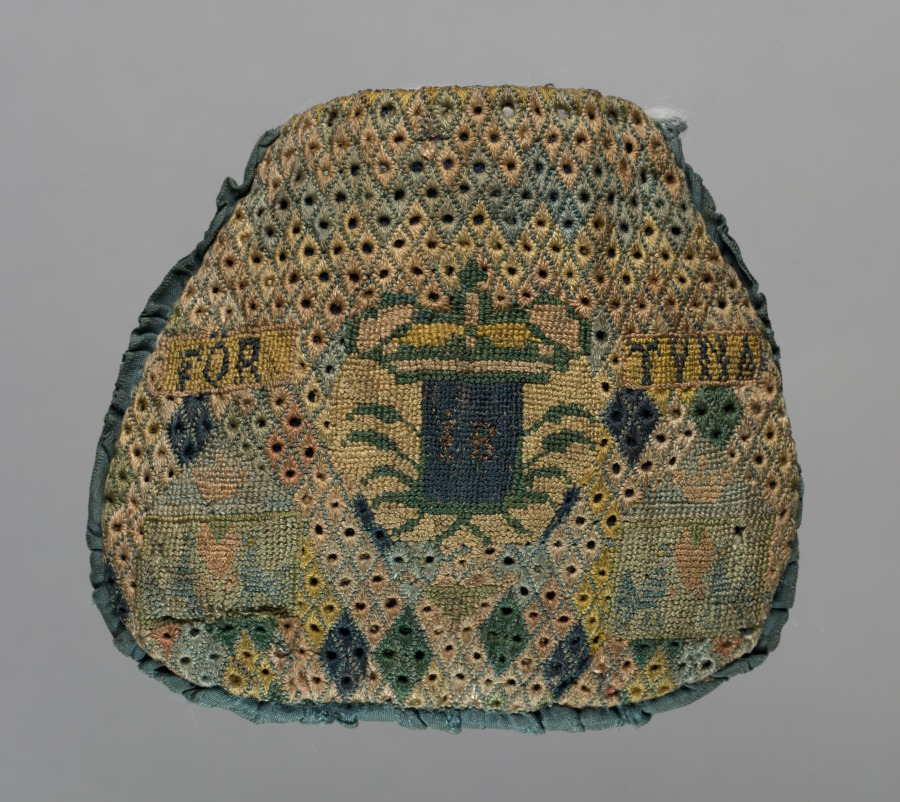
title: Purse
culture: Sweden, 18th century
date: 1710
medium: Needlework, silk?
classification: Embroidery